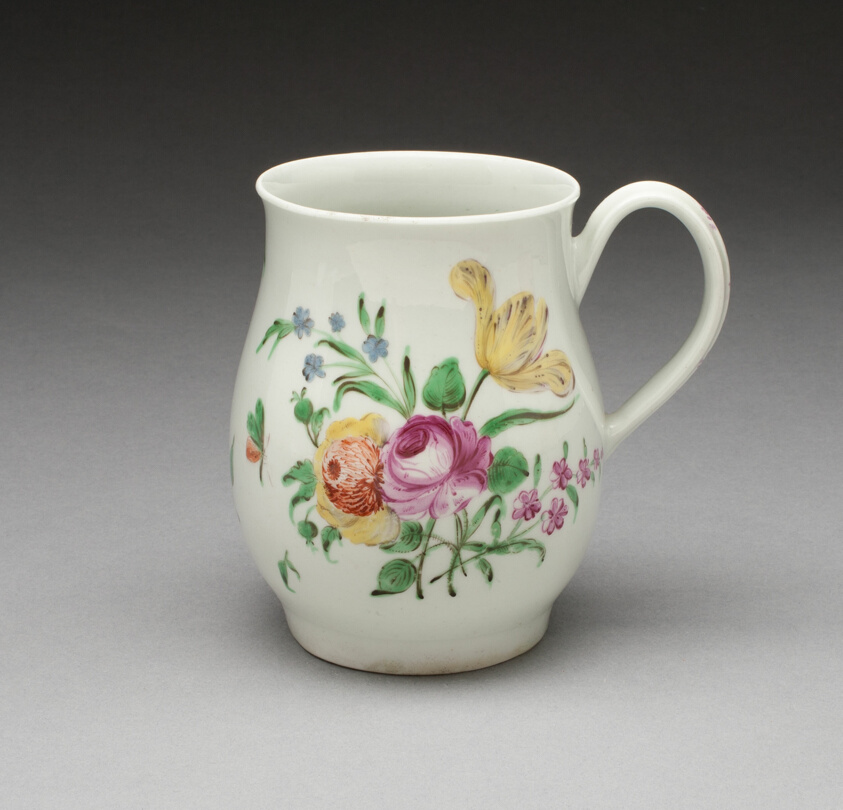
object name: Ceramics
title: Mug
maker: Worcester Porcelain Factory (Warmstry House Period, 1751–1783); Worcester, England, founded 1751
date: c. 1760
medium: Soft-paste porcelain, polychrome enamels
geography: Worcester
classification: ceramics; tableware; porcelain; european decorative arts